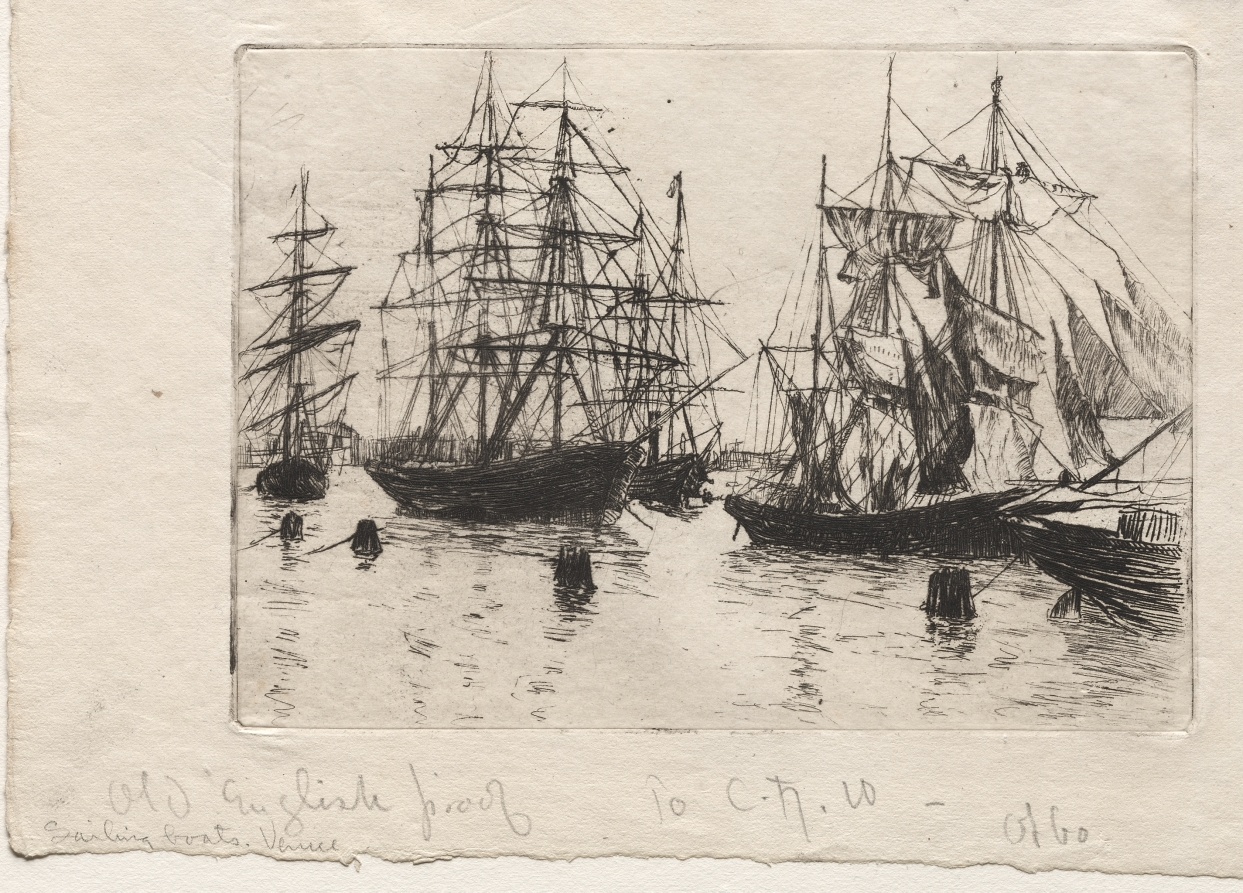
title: Sailing Boats, Venice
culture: America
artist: Otto H. Bacher (American, 1856–1909)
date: 1880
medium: etching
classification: Print